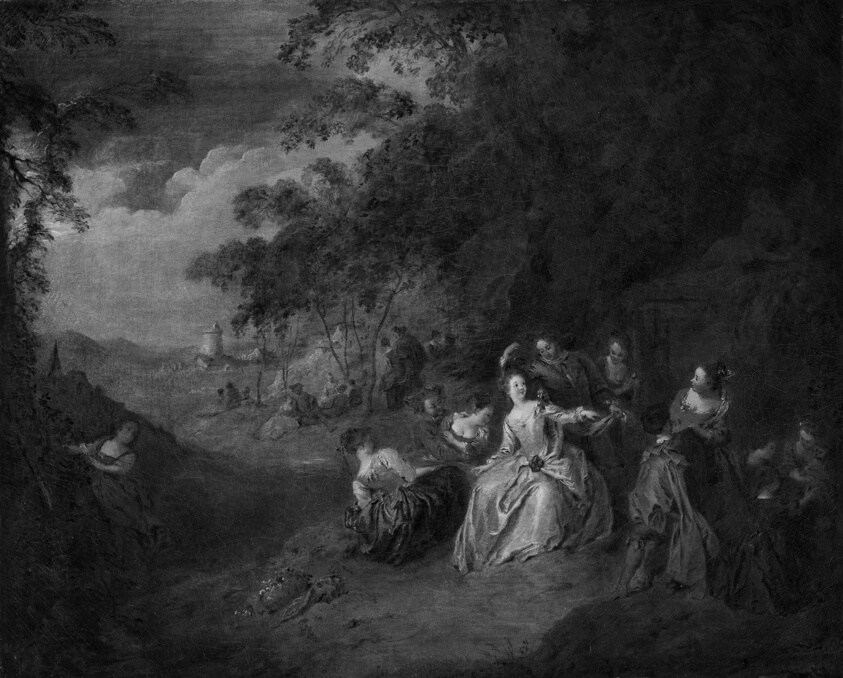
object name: Painting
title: Love in the Open Air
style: 18th Century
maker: After Jean Baptiste Joseph Pater (French, 1695–1736)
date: after c. 1731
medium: Oil on canvas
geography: France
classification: oil on canvas; french; oil paintings (visual works); paint; painting; european painting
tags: love, women, wealth, trees, nature, men, luxury, leisure, flowers, couples, clouds